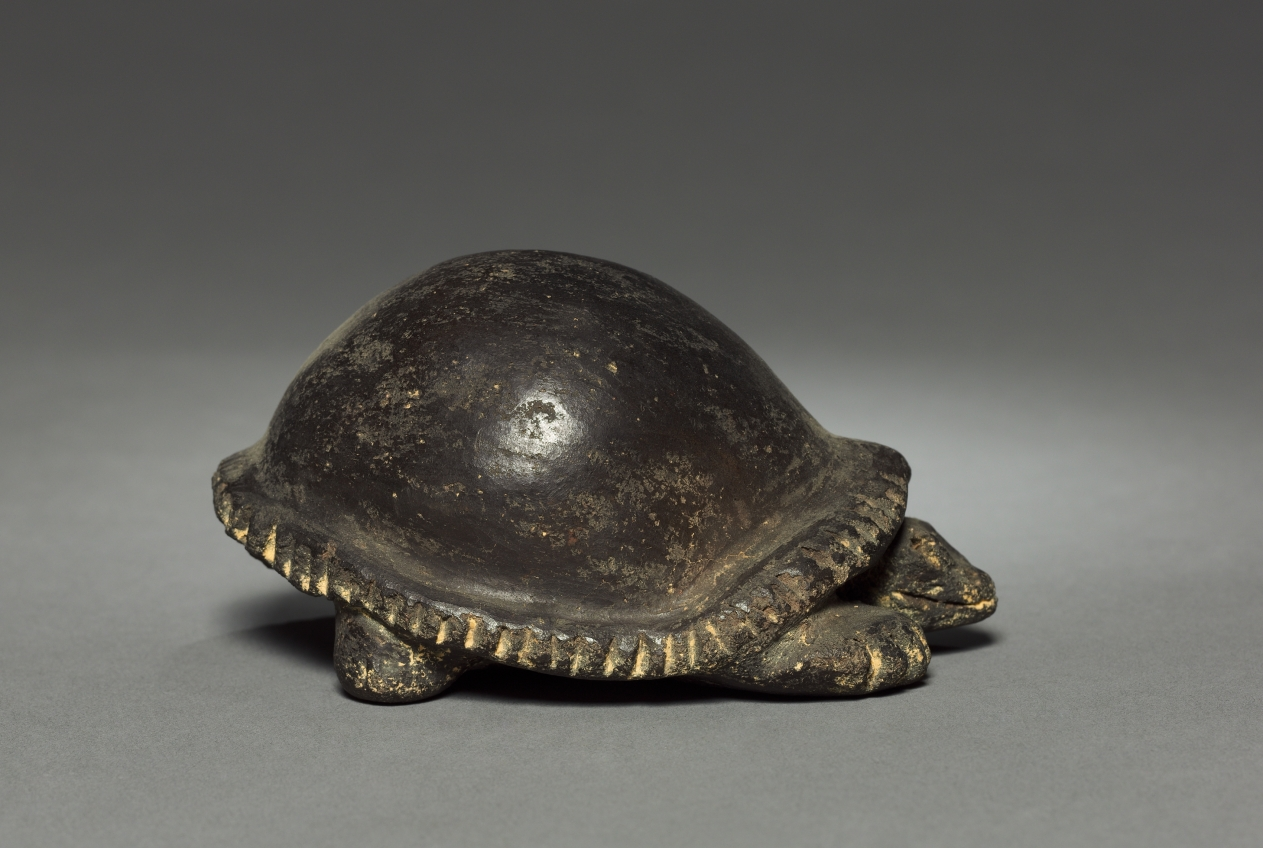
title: Turtle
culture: Colombia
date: before 1921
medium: pottery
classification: Ceramic